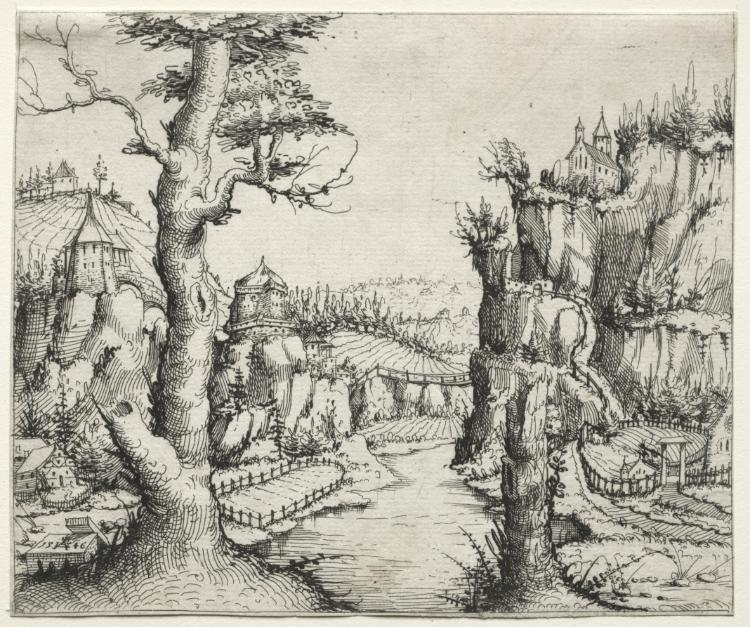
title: River Landscape with Rocks at Left and Right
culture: Germany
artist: Augustin Hirschvogel (German, 1503–1553)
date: 1546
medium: etching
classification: Print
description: Within a decade, Augustin Hirschvogel and Hanns Lautensack were aware of the landscapes by Wolfgang Huber and Albrecht Altdorfer and began to expand their artistic vocabulary. Hirschvogel probably made this group of etchings after traveling down the Danube from Nuremberg, through Regensburg and Passau, to his residence in Vienna. The many buildings, cultivated fields, and roads emphasize human activity and its mark on the landscape but always in the service of articulating a particular topography. Hirschvogel’s etchings found an international audience, informing the development of the landscape genre as far away as Italy and the Netherlands.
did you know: Hirschvogel's etched landscape hints at the presence of human activity, yet no humans can be seen.